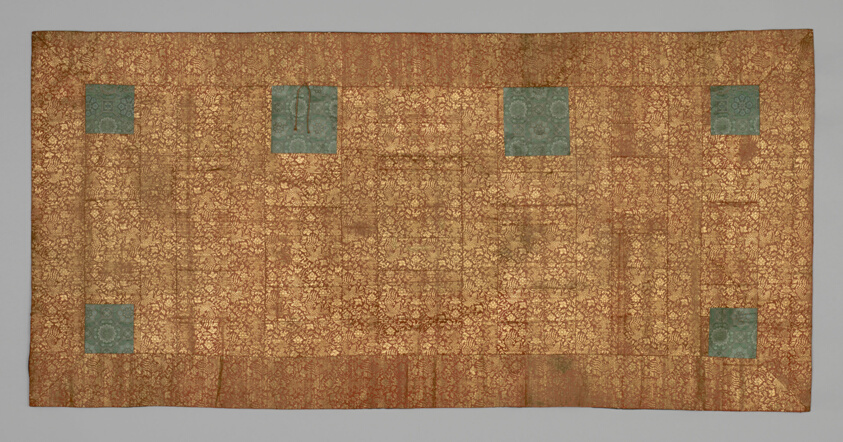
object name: Textile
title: Kesa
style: edo (japanese period)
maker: Japan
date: Edo period (1615–1868), late 18th century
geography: Japan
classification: textile; weaving; costume; liturgical - buddhist